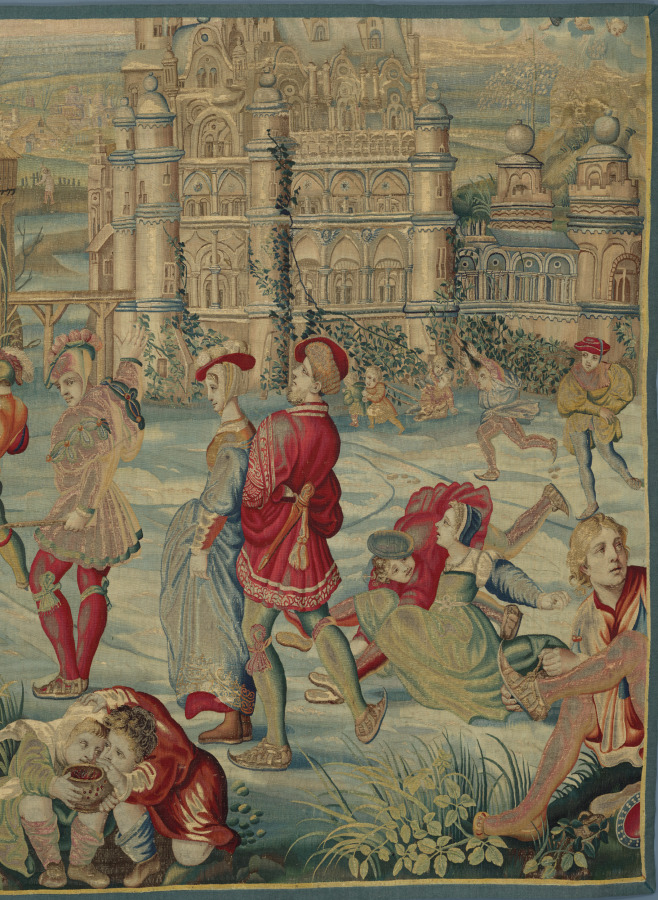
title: Winter: Skating Scene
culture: France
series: Four Seasons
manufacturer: possibly by Gobelins Manufactory (France, Paris, est. 1662)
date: designed c. 1535, woven mid- to late 1600s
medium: Wool, silk, and gold filé: tapestry weave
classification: Tapestry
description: People of all classes and ages enjoyed ice skating, a winter pastime popularized in the Netherlands. Here, some couples are already skating and slipping on the ice, while others tie on their skates or huddle around braziers (portable coal heaters) to keep warm. One affectionate couple in the foreground hold hands as they walk. A castle on the far edge of the frozen lake occupies the background. In the left distance, several small figures holding ladders and long hooks run toward a building that has caught on fire, a frequent occurrence in the winter when wooden houses were heated by fireplaces.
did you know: If you look closely you can see that the top edge of this scene is missing; look at the top of the castle on the right or the forest fire on the left.